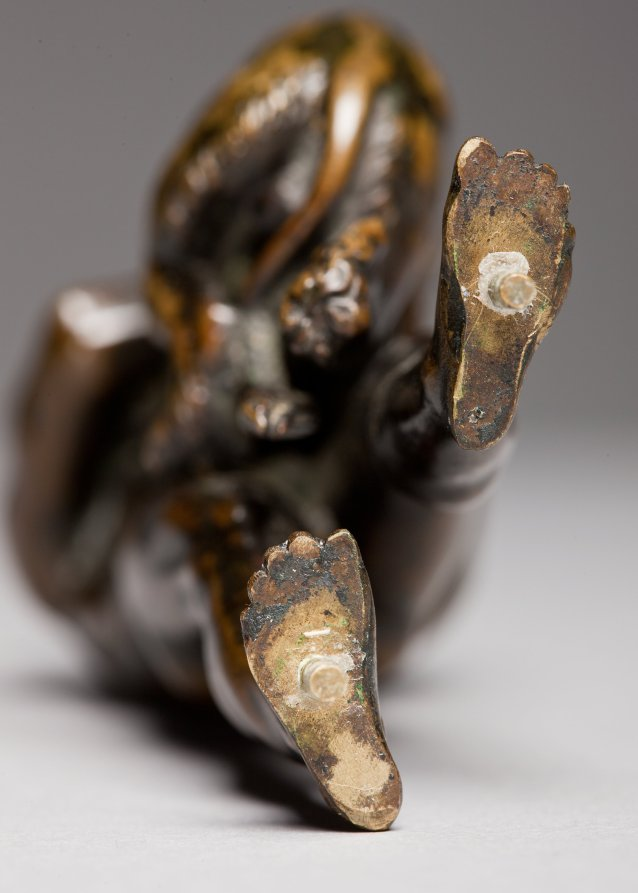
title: Hercules and the Nemean Lion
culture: Italy or France, 16th century or later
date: 1500s or later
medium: bronze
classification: Sculpture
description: The original owner of this work would have understood that this scene referred to the entire story of Hercules, the demi-god who had to accomplish twelve labors. The lion is named after the city of Nemea, near Corinth, a monstrous beast sent by the goddess Hera to wreak havoc on the area. After killing the lion, Hercules wore his pelt, commonly seen in other representations of the hero.